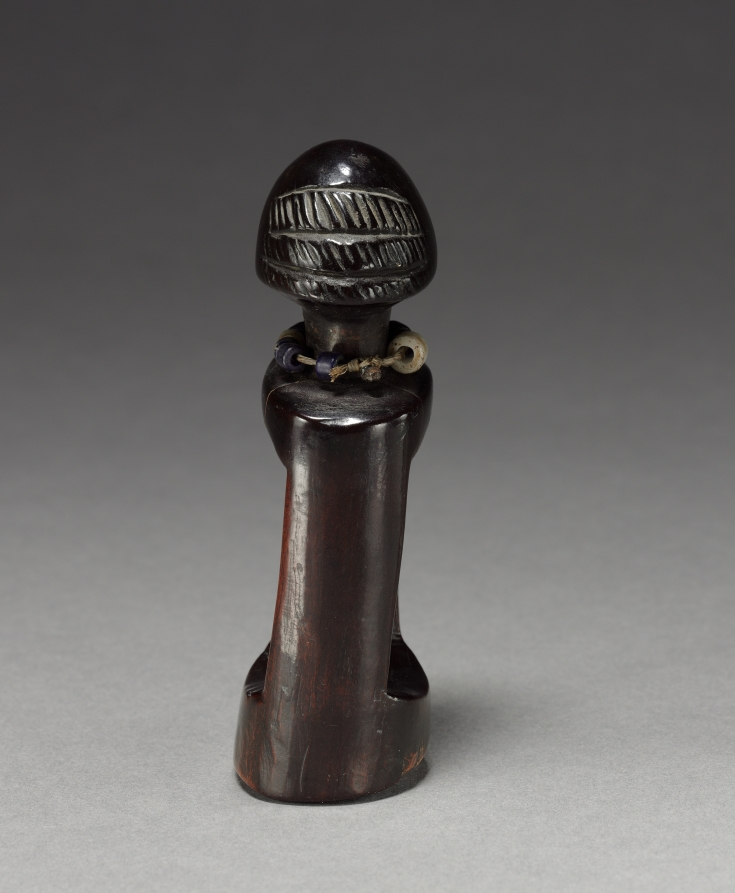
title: Divination Implement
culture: Africa, Central Africa, Democratic Republic of Congo, Luba-style maker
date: late 1800s–early 1900s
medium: Wood, glass beads, and natural fiber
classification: Sculpture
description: This device helped contact an ancestral spirit who clarified misfortunes. The diviner awakened the ancestor by anointing the rectangular frame of the figurine with pungent basil leaves. Sitting on a textured woven mat, the diviner held one side of the instrument while the client held the other. The diviner then posed questions to the ancestor who responded through certain movement signaling affirmation.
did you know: This divination implement is a kakishi (embodiment of an ancestor) device that connects the diviner and the client to the spirit they wish to contact.